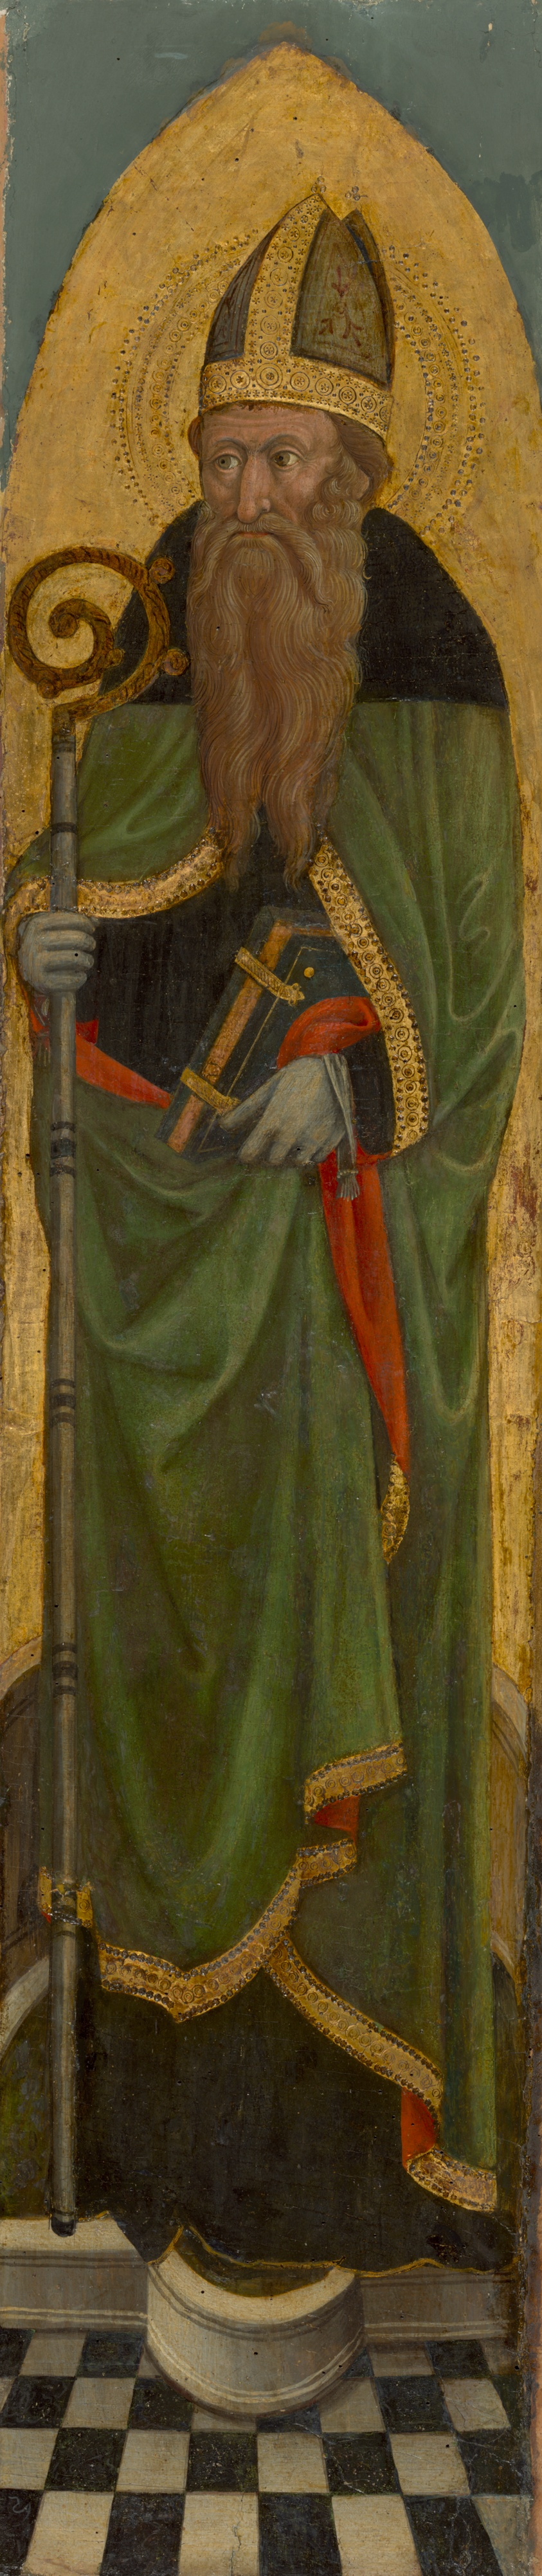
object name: Painting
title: Bishop Saint from an Augustinian altarpiece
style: 15th century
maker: Italian; Venice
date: 1450/75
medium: Tempera and oil on panel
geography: Venice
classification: altarpiece; tempera; altar; Italian; oil on panel; oil paintings (visual works); painting; european painting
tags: saints, altar, Christian subjects, Christianity, religion, religious, religious attire, religious figures, religious scenes, staffs, book, bibles, gold (color), green (color), man